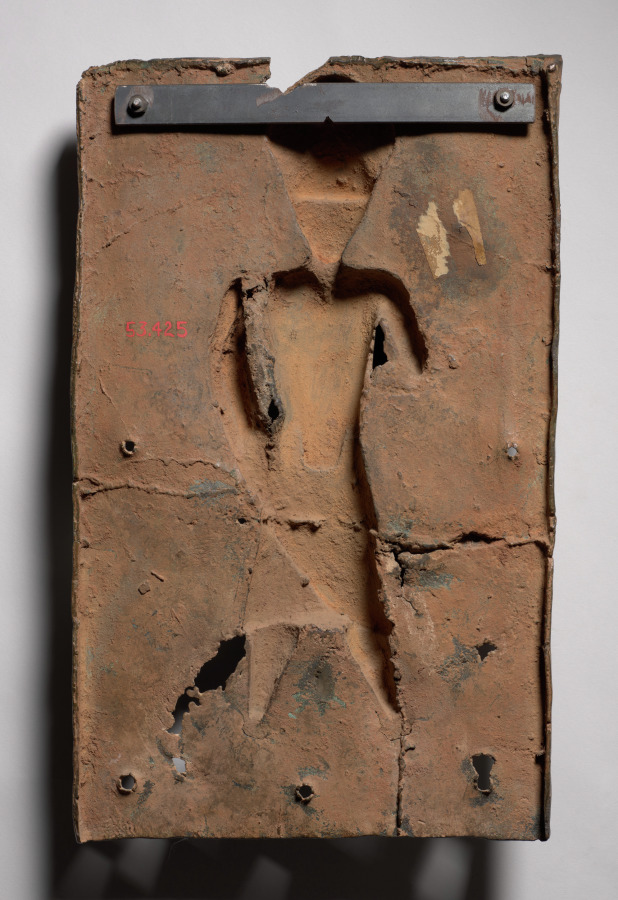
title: Plaque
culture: Nigeria, Benin Kingdom, Ẹdo peoples, members of the Igun Eronmwon (royal brasscasters) guild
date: 1500s–1600s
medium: Copper alloy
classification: Sculpture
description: Craftsmen modeled brass plaques like this in wax before casting them with hot metal. Molds pushed out figures’ general shapes, then details—such as this warrior’s staff and court sword (ẹbẹn)—were added by hand. Reflecting Benin’s global connections, the incised flowers may have Islamic or European origins. Called ebe-amẹn (river leaves) they are identified with Olókun, god of the waters. The interlaced side motifs may connect several early plaques also linked by topic and style. The palace plaques were in storage before the 1897 Siege of Benin. Recently, an art historian virtually reconstructed their former display in the palace based on their dimensions and imagery.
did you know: The bent sides of this plaque once helped attach it to wooden beams in a palace.